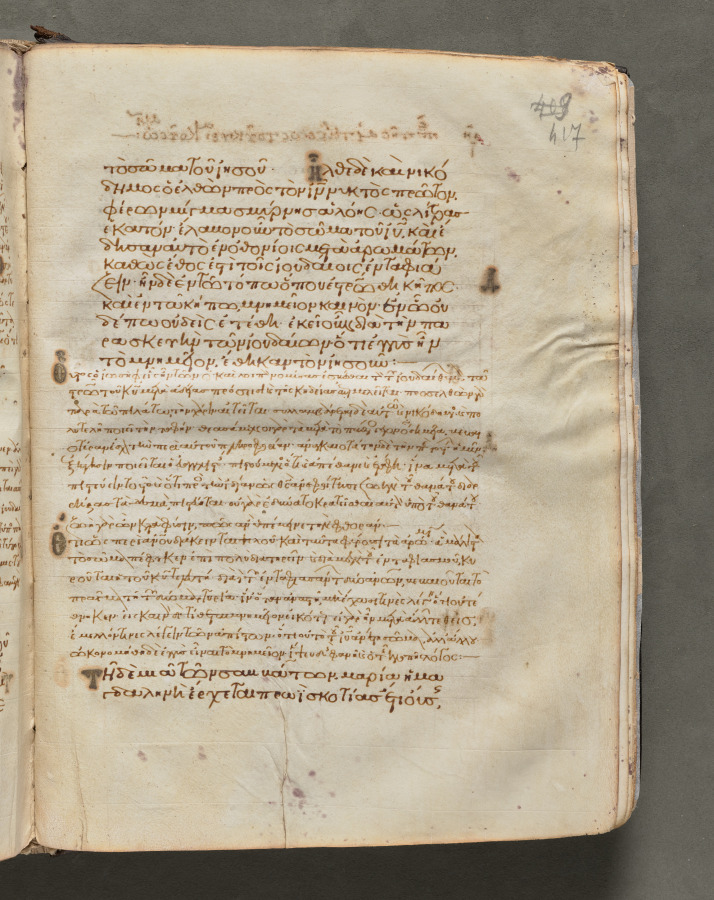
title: Text, folio 417 (recto), from a Gospel Book with Commentaries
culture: Byzantium, Constantinople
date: c. 1000–1100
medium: ink, tempera, and gold on vellum; leather binding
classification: Bound Volume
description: Each of the four gospels in this book opens on a page with brilliantly illuminated borders depicting the author of the text as well as birds—principally peacocks, symbols of the immortality of the soul—and fountains, representing the fountain of life and the salvation of the soul. This volume consists of 428 leaves with texts in Greek. Its level of sophistication suggests that it was probably written and decorated in a monastery in Constantinople.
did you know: Gospel books were carried in procession through Byzantine churches.